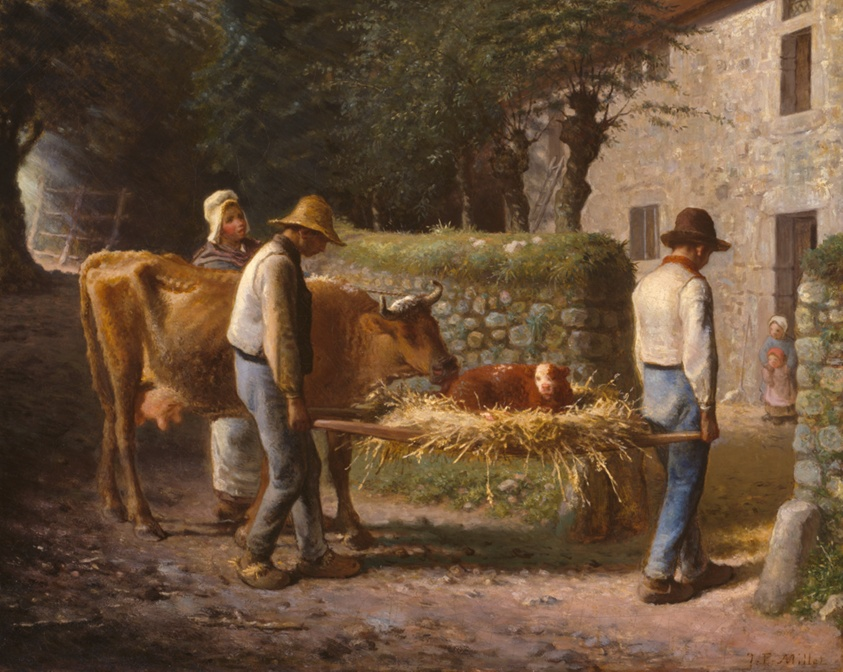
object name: Painting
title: Peasants Bringing Home a Calf Born in the Fields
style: nineteenth century, Barbizon School, 19th century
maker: Jean-François Millet (French, 1814–1875)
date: 1864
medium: Oil on canvas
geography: France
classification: oil on canvas; paint; oil paintings (visual works); french; painting; european painting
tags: rural life, calfs, cows, animals, field, farm, men, women, woman, children, trees, building, wall, stone, Century of Progress, world's fairs, Chicago World's Fairs